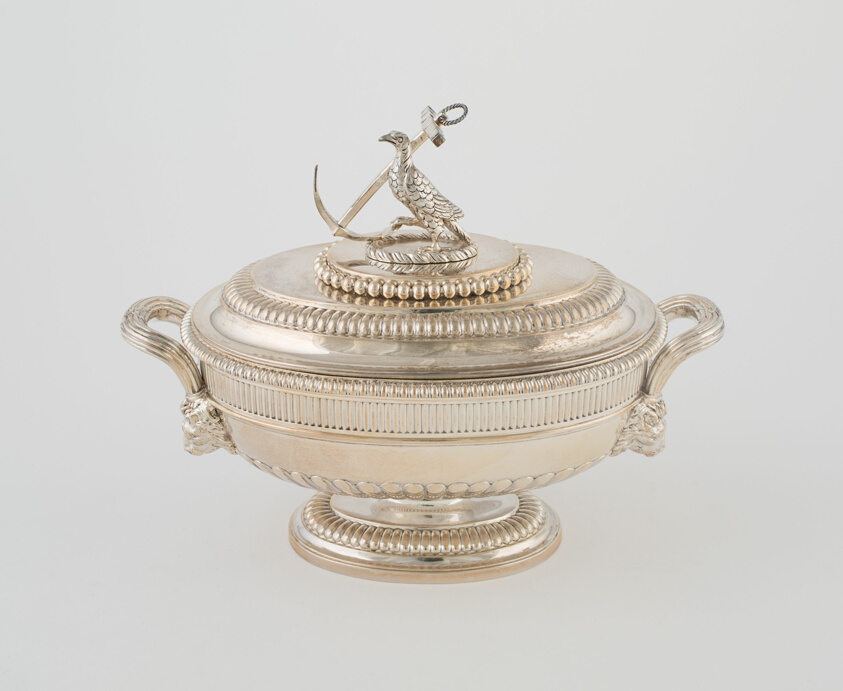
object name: Metalwork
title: Sauce Tureen and Cover from the Hood Service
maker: Paul Storr; English, 1771-1844; London, England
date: 1807/08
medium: Sterling silver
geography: England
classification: silver; metalwork; european decorative arts